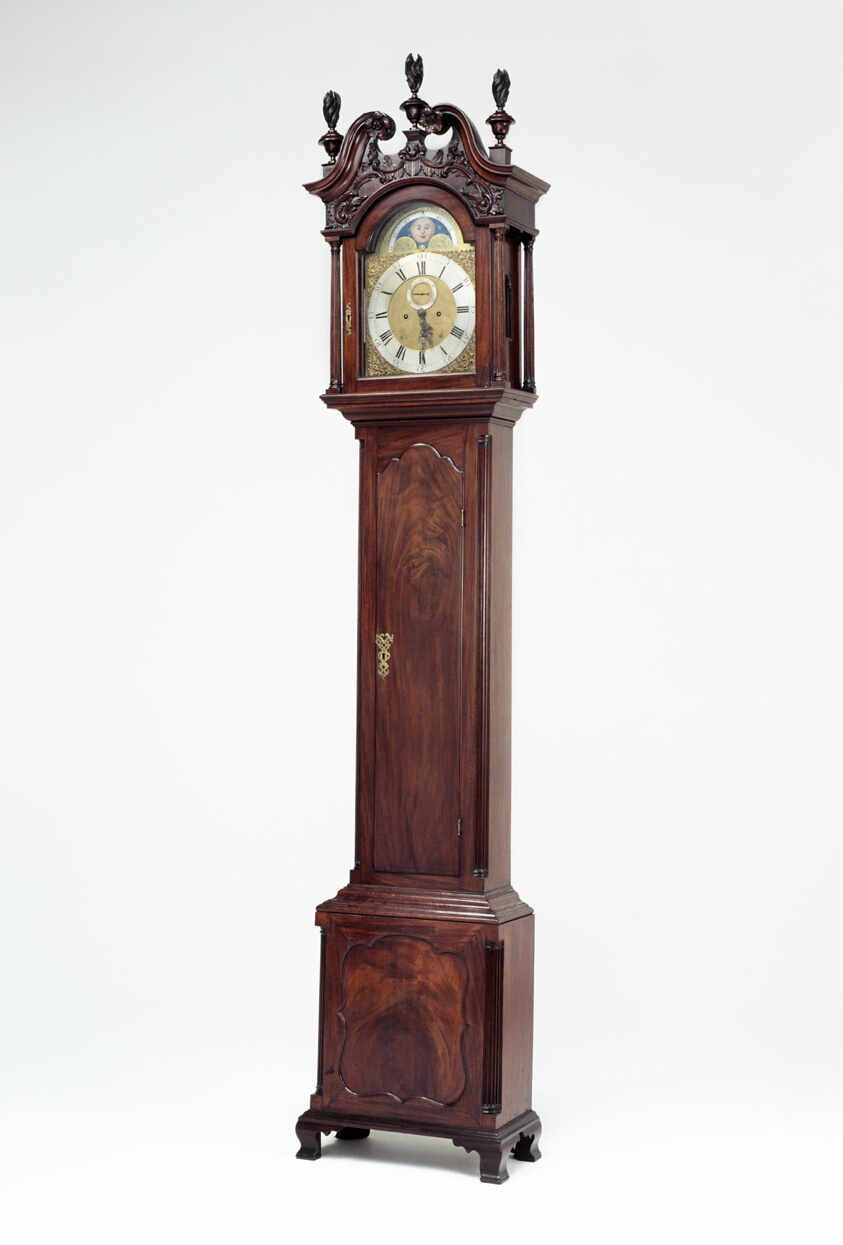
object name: Decorative Arts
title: Tall Case Clock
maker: Works by John Wood Jr.; American, 1736–1793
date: 1765–75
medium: Mahogany and tulipwood, brass, iron, and glass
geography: Philadelphia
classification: case furniture; furniture; american decorative arts; american arts; decorative arts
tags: furniture